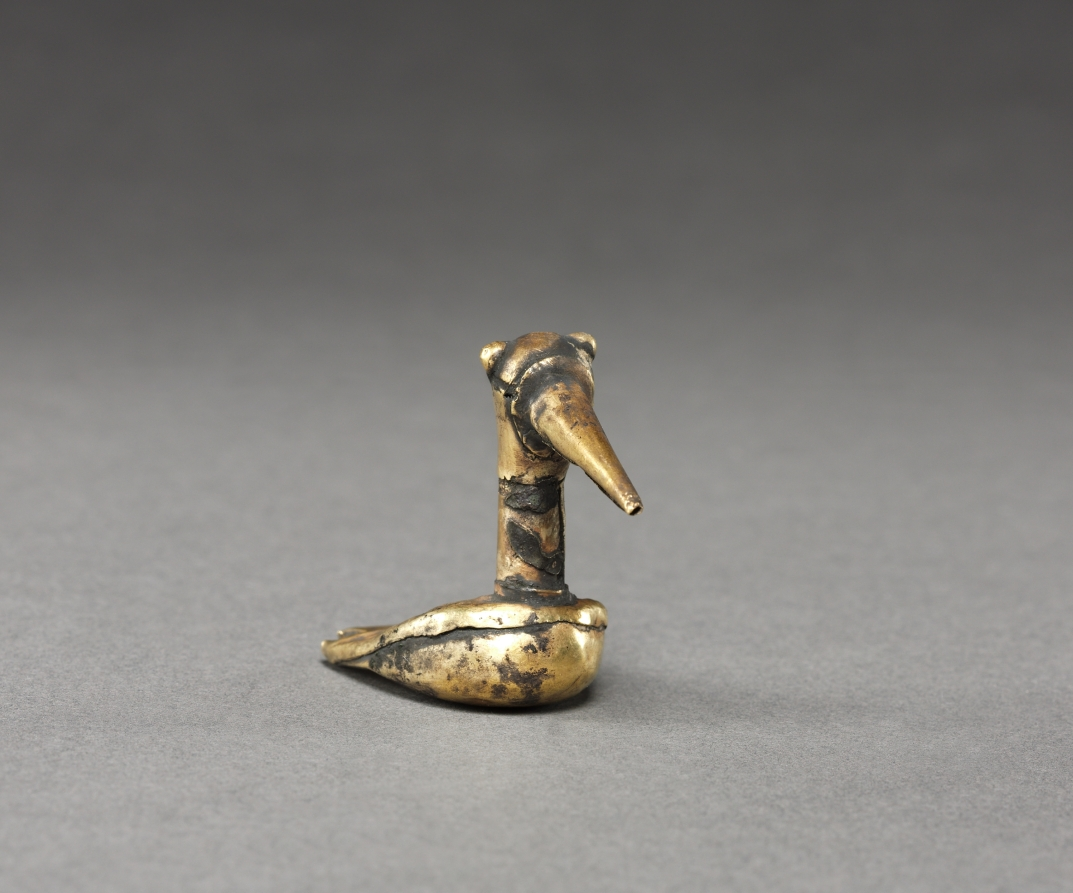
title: Bird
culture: Peru, North Coast, Chimú Culture, 13th-15th century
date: 1200s-1400s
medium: bronze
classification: Metalwork